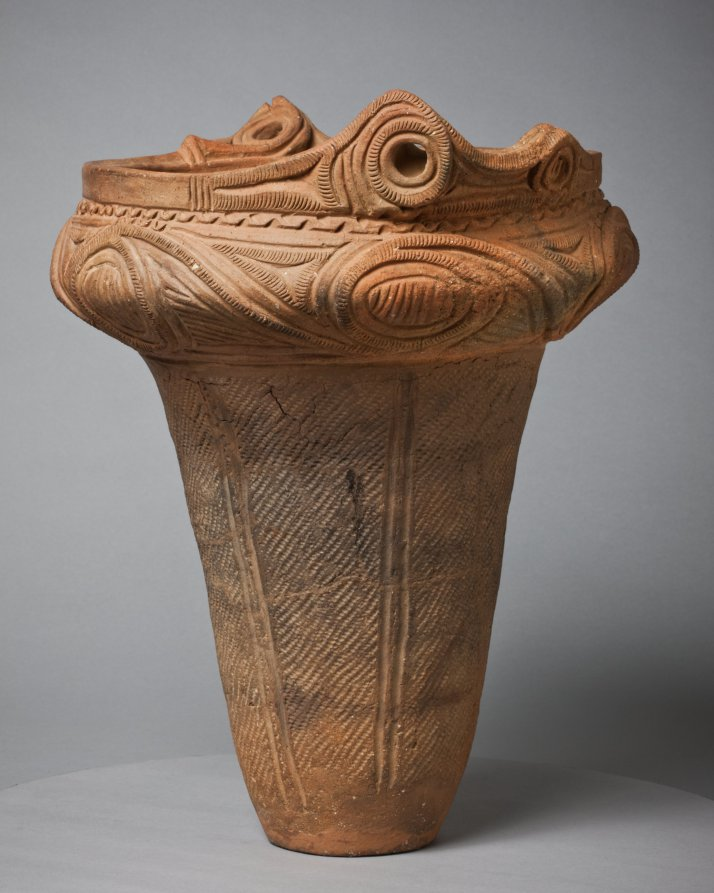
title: Urn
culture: Japan, Jōmon period (c. 10,500–300 BCE)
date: c. 2000 BCE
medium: earthenware, terracotta, impressed and incised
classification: Ceramic